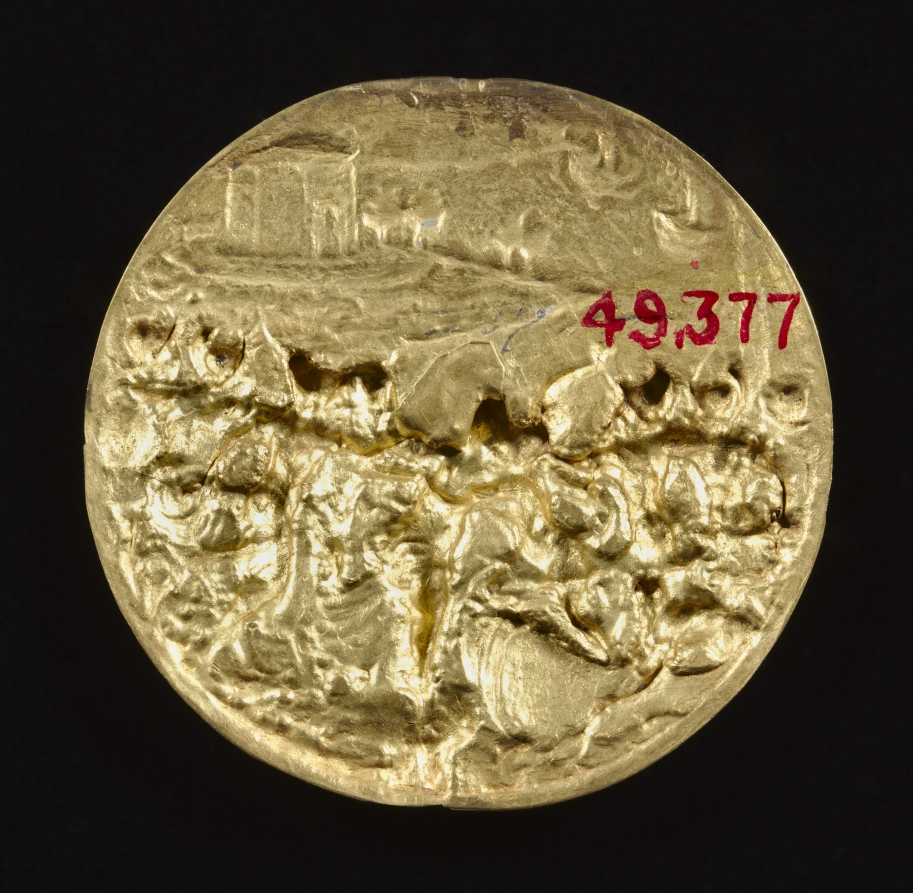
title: Hat Jewel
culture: France, mid-16th century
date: mid 1500s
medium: enameled gold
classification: Jewelry